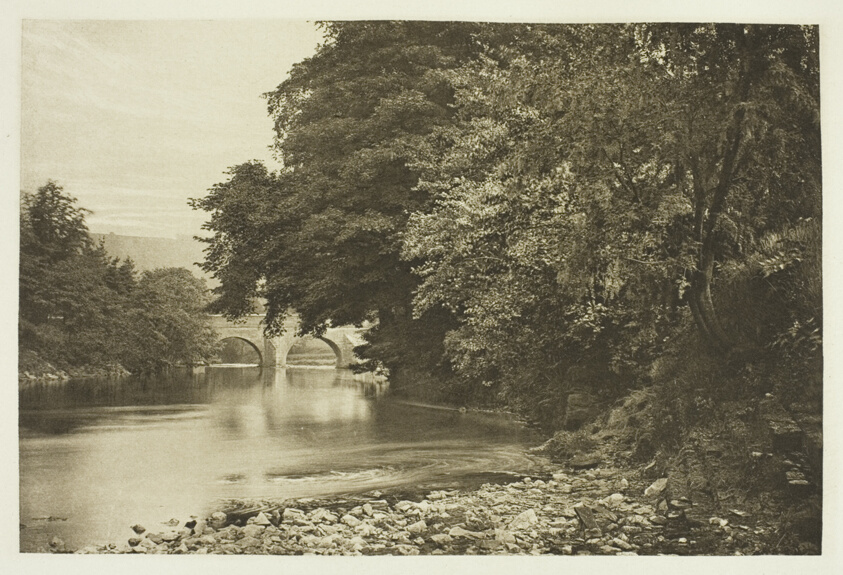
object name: Photograph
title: Rowsley Bridge, on the Derwent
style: 19th century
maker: Peter Henry Emerson (English, born Cuba, 1856–1936)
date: 1880s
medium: Photogravure, plate XXXVI from the album "The Compleat Angler or the Contemplative Man's Recreation, Volume II" (1888)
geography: England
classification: photogravure; photomechanical process; photography; photograph